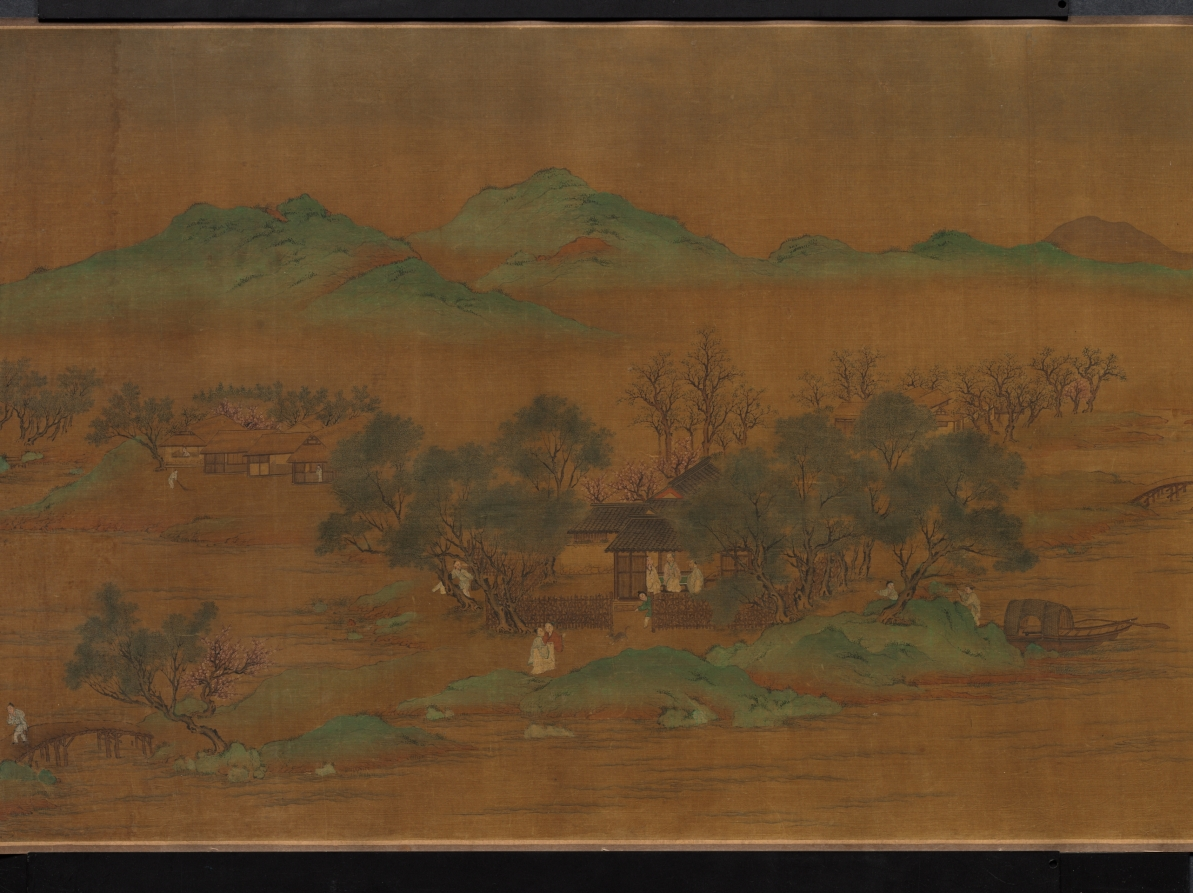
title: Landscape, The Palace of the Clouds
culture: China, Qing dynasty (1644-1911)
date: 1644–1911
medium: handscroll, ink on silk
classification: Painting